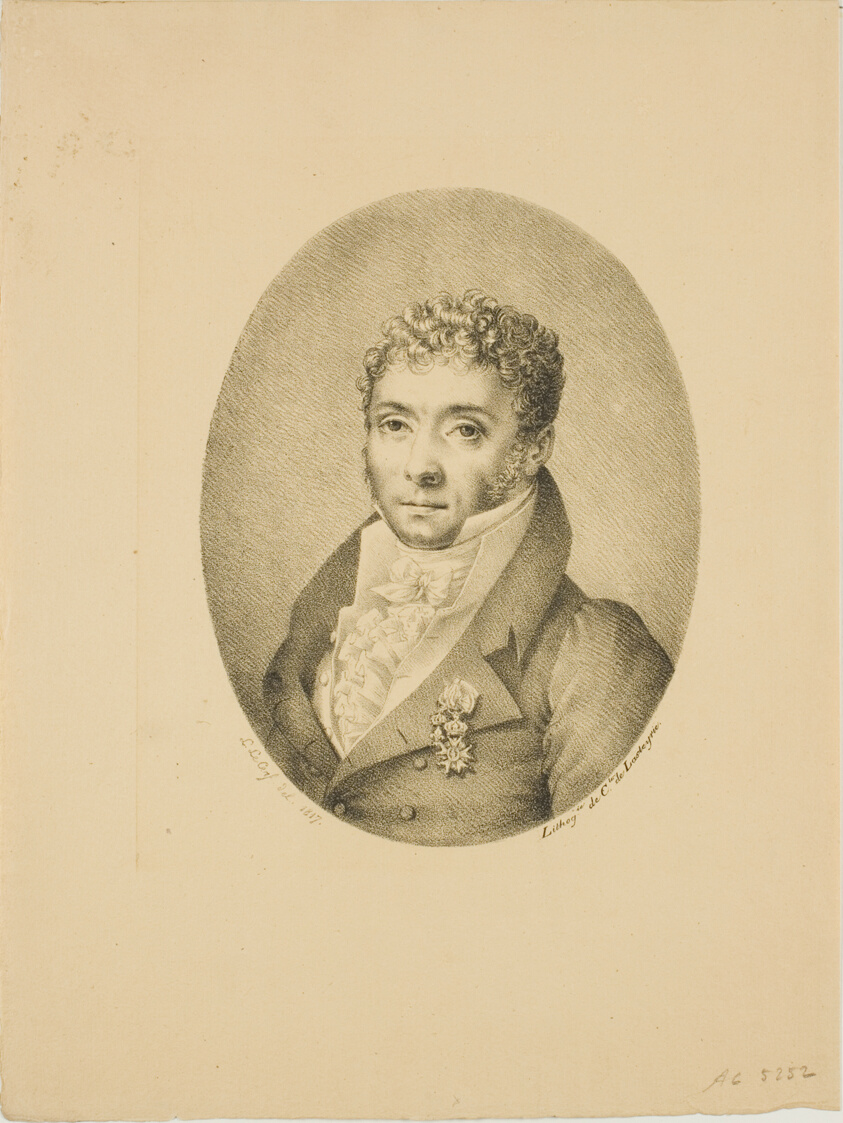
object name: Print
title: Portrait of a Man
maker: probably Jacques Louis Constant Le Cerf (French, active 1814-1824); possibly Louis Le Cerf (French, born 1787); printed by Comte de Charles Philibert Lasteyrie du Saillant (French, 1759-1849)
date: 1817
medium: Lithograph in black on bistre paper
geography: France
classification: lithograph; print; prints and drawing